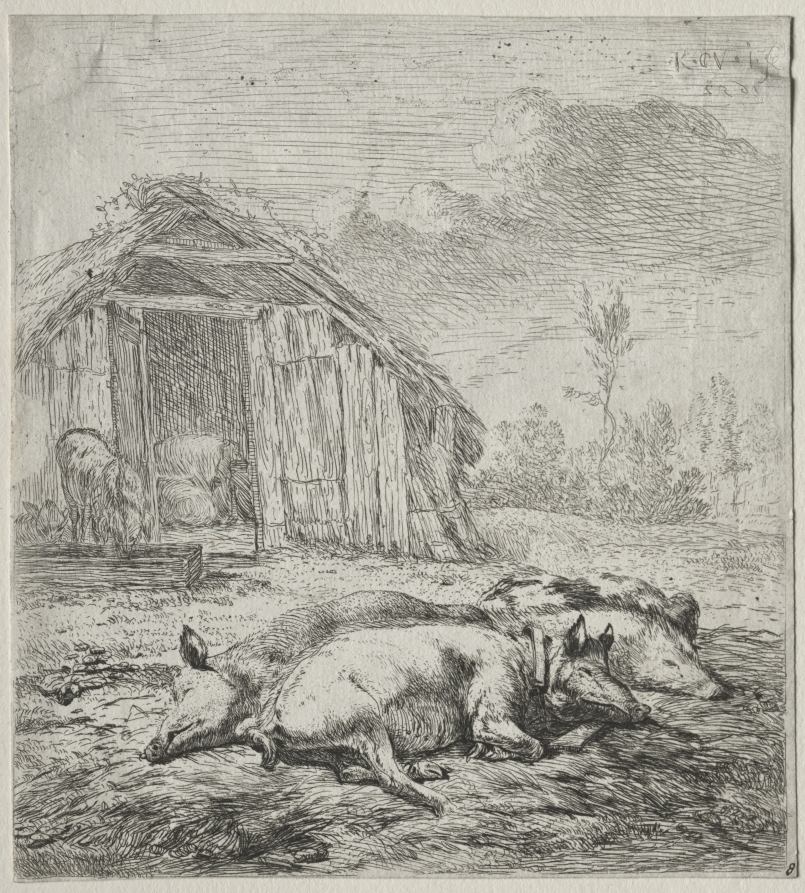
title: Three Swine Lying in Front of a Sty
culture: France, 19th century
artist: Karel Dujardin (Dutch, c. 1622–1678)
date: 1652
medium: etching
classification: Print